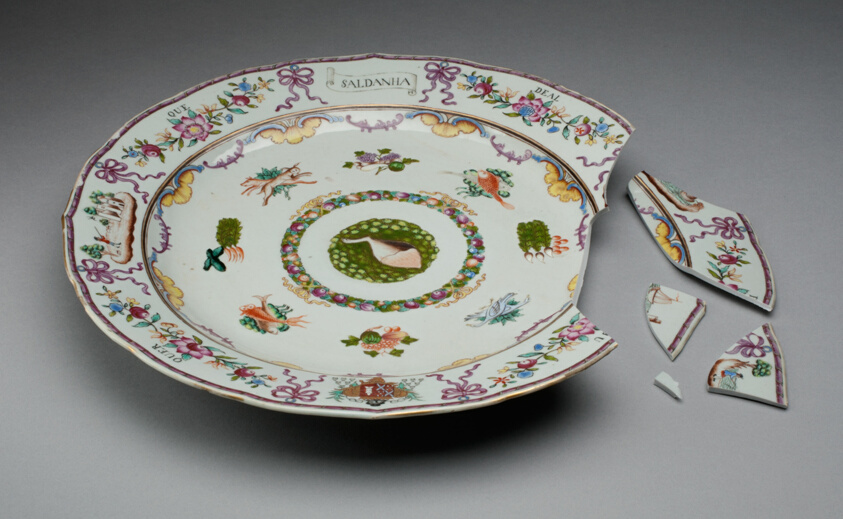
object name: Ceramics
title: Dish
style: chinese export, Chinese (culture or style), East Asian, asian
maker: China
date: c. 1765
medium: Hard-paste porcelain with polychrome enamels and gilding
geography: China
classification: dish (vessel); chinese export porcelain; porcelain; european decorative arts; ceramics